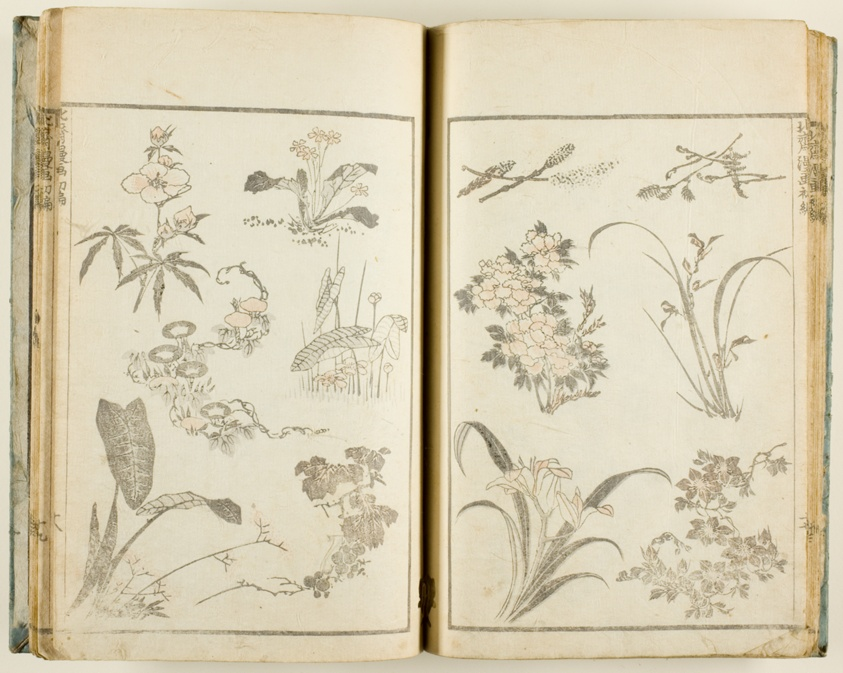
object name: Book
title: Hokusai manga (Sketches of Hokusai), v. 1-3, 5-11, and 14 of 15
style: Japanese (culture or style)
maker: Katsushika Hokusai 葛飾 北斎; Japanese, 1760-1849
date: 1812/78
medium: Book; woodblock printed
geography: Japan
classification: book; woodblock print